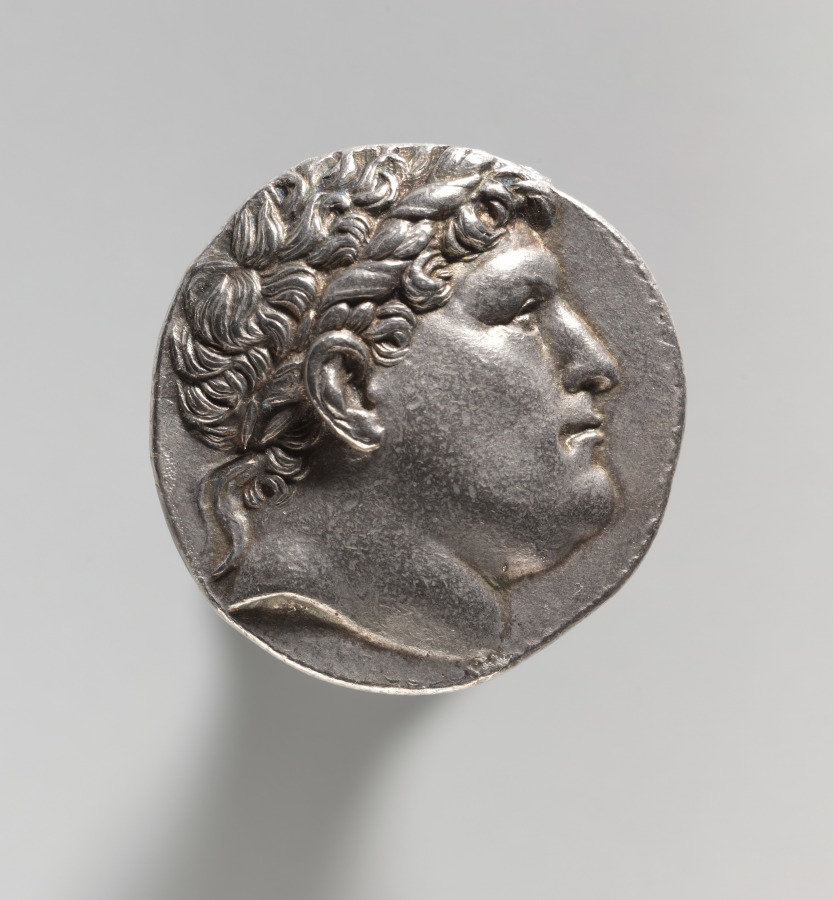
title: Tetradrachm: Head of Philetauros with Laureate Diadem (obverse)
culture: Anatolia, Kingdom of Pergamum (281–133 BCE), Eumenes I (263–241 BCE)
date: 262–241 BCE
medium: silver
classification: Coins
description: The depictions of rulers found on this coin represents a realistic type of portraiture, similar to that found on coins in the West.